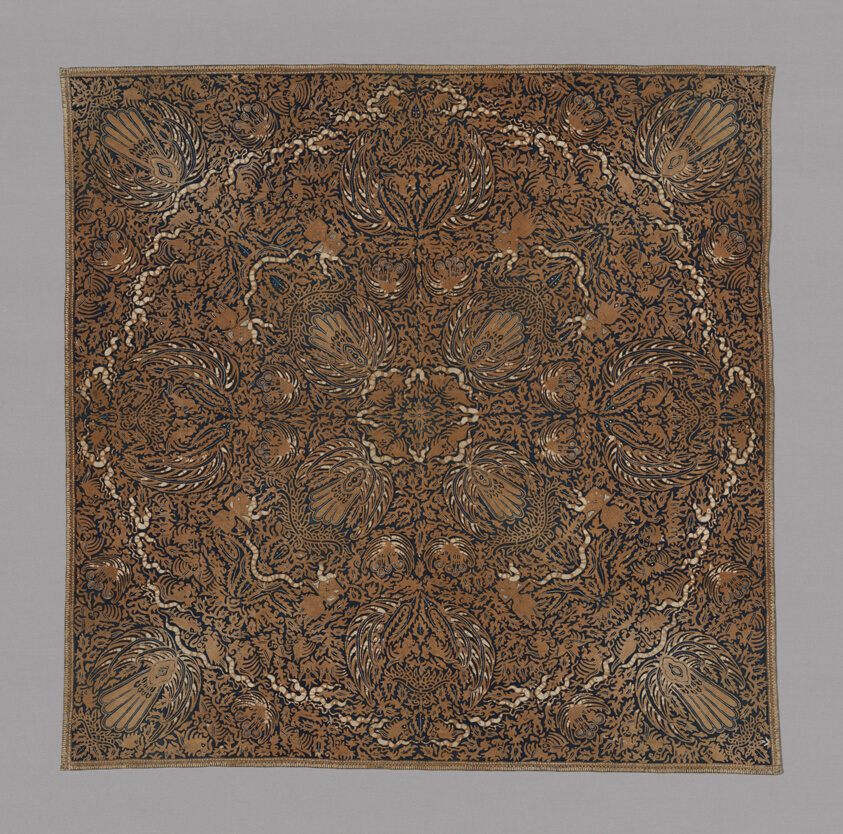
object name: Costume and Accessories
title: Iket (Headcloth)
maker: Indonesia, Java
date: 19th century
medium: Cotton, batik dyed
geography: Java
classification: textile; weaving; costume; dress (garment); clothing